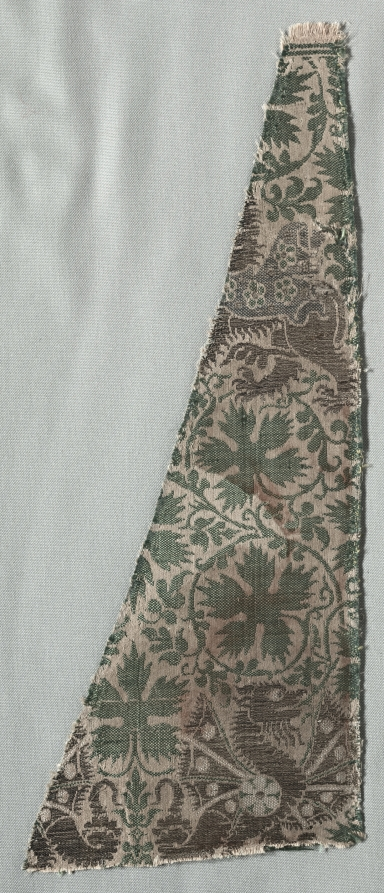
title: Silk Fragments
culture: Italy, Lucchese, second half of 14th century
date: 1350–1399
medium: lampas weave, brocaded; silk and gold thread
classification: Textile